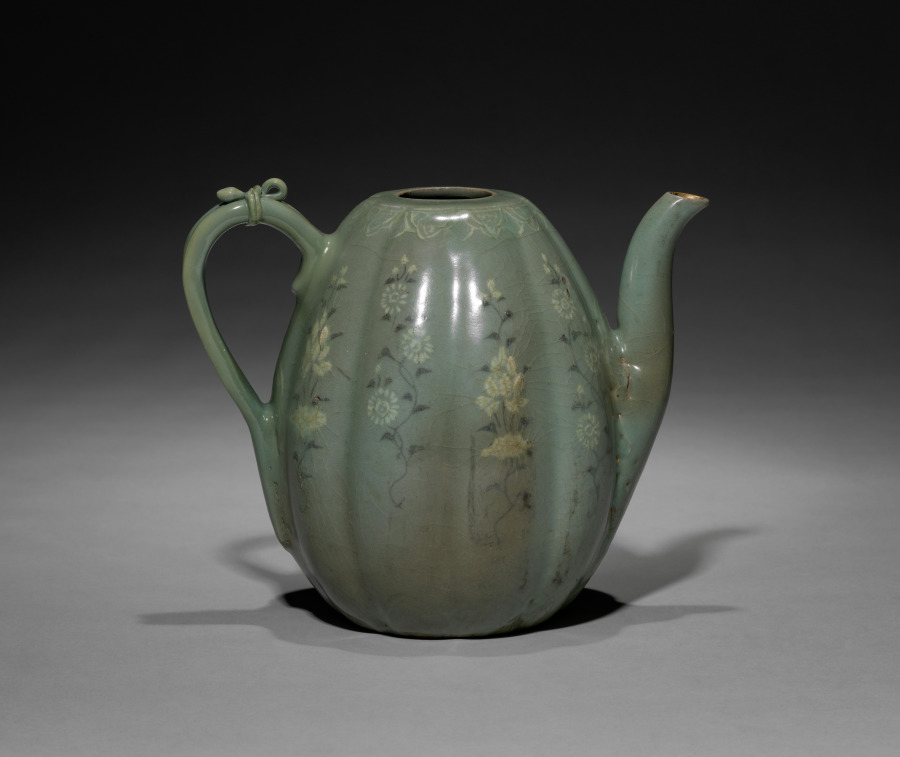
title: Melon-shaped Ewer with Incised Peony Design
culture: Korea, Goryeo dynasty (918–1392)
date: 918–1392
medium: pottery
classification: Ceramic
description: This melon-shaped pitcher is adorned with a delicate drawing that renders chrysanthemum buds with full blossoms in white and black inlays. In Korea, chrysanthemum flowers and leaves were made into both tea and wine. Chrysanthemum wine was enjoyed during the the Double Nine Festival (the ninth day of the ninth month in the lunar calendar) when praying for longevity.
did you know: The shape of this pitcher resembles a type of yellow muskmelon cultivated mainly in East Asia.